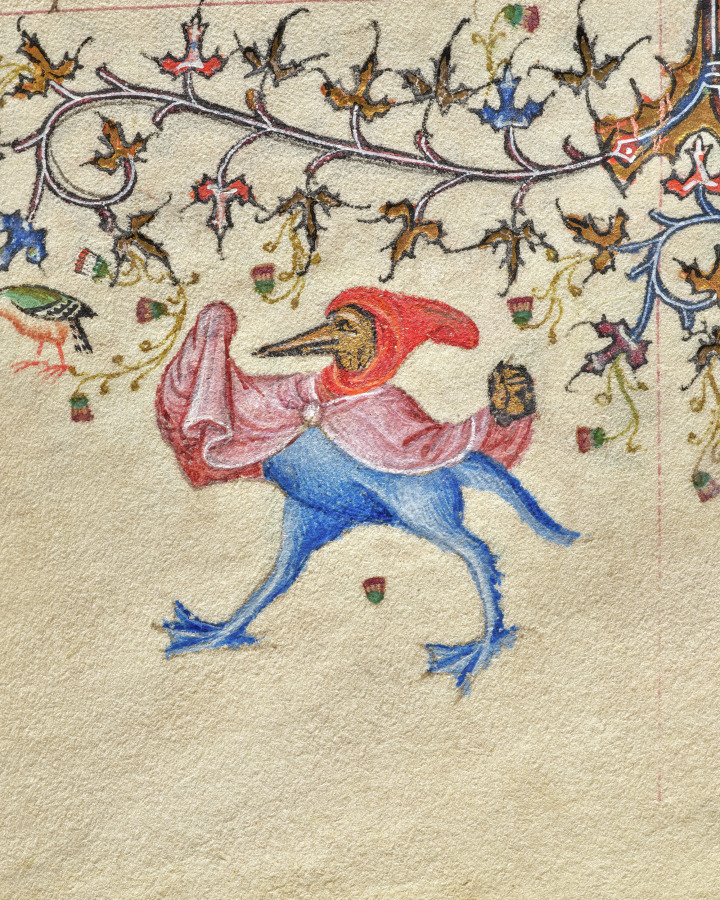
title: Hours of Charles the Noble, King of Navarre (1361-1425): fol. 284r, Text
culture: France, Paris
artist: Master of the Brussels Initials and Associates (French)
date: c. 1405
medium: ink, tempera, and gold on vellum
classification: Bound Volume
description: This precious volume was obviously highly prized by its owner, the French-born King of Navarre, who had his coat of arms painted on no less than twenty folios. Rather than directly commissioning this manuscript from a specific workshop, it seems that Charles the Noble acquired his book of hours -- perhaps ready-made for the luxury market -- while on a trip to Paris in 1404-05. A collaborative effort, six painting styles are evidenced within the pages of this codex, those of two Italians, two Frenchmen, and two Netherlanders. The painter who was responsible for the planning and decoration of the book, and who produced seventeen of the large miniatures, was a Bolognese artist known as the Master of the Brussels Initials. His principal assistant, responsible for most of the borders, was a Florentine who signed his name "Zecho" da Firenze on folio 208 verso.